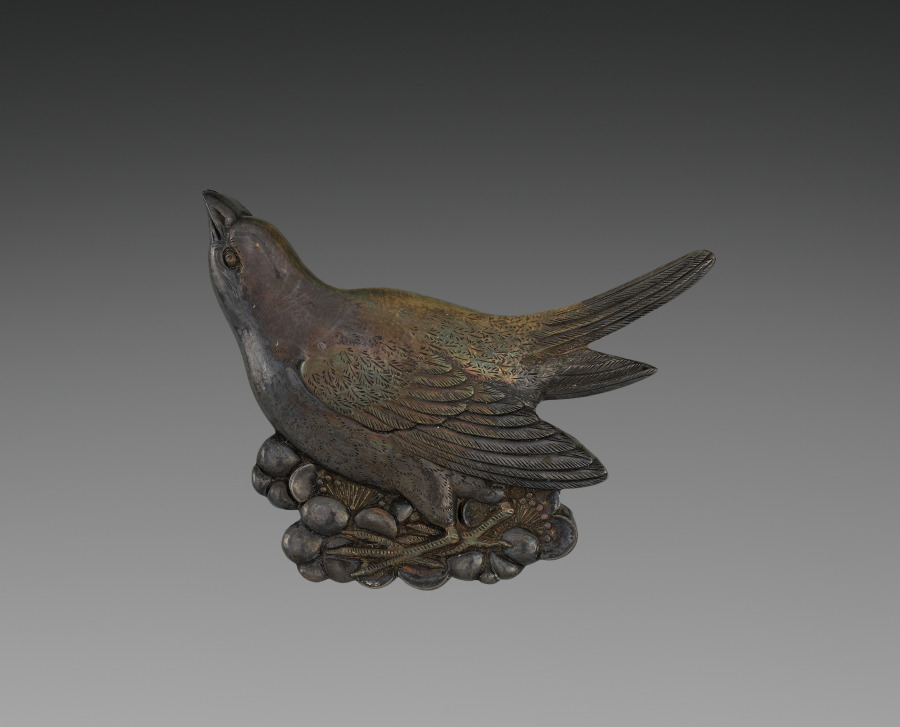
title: Writing Box (Suzuribako) with the “First Song” (Hatsune) Chapter from the Tale of Genji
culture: Japan, Meiji period (1868–1912)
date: early 1900s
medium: Lacquered wood with gold and silver sprinkled powder (maki-e), foil application (kirikane), and metal inlay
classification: Lacquer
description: The design of this box was inspired by an object in the 1639 lacquer wedding set of Chiyohime, the daughter of the shogun (ruler). Information about the set became available in the Meiji period, leading some lacquer artists to emulate its designs. This box features a scene from the chapter “First Song” (Hatsune) of the Tale of Genji, in which Prince Genji and his love Murasaki enjoy her garden. It incorporates the written characters for “first” (初, hatsu) and “sound” (音, ne), indicating the first song of the warbler in spring, associated with the new year—the water dropper for mixing the ink is in the shape of this bird.